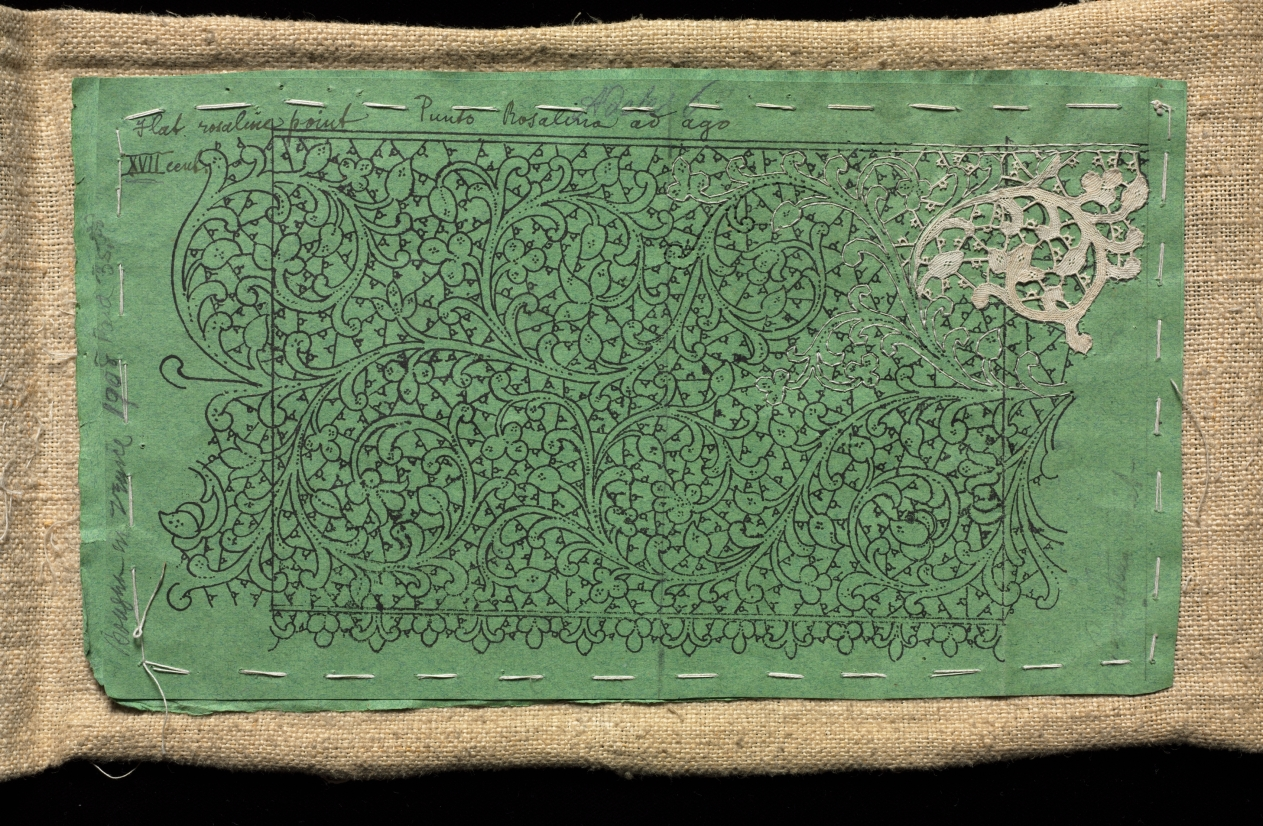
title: Pattern for lace with small section of lace worked on It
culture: Italy, Venice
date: 1600s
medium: Paper and linen?: lace pattern on paper with small section of needle lace (Venetian flat point) worked on It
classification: Lace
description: In this object, Venetian Flat Point needle lace is worked on a small section of the green card, which is in turn attached to a piece of coarse, plain weave linen. On the back of the linen is a paper label, indicating that at one time this object was in the collection of Florence L. Cohen.